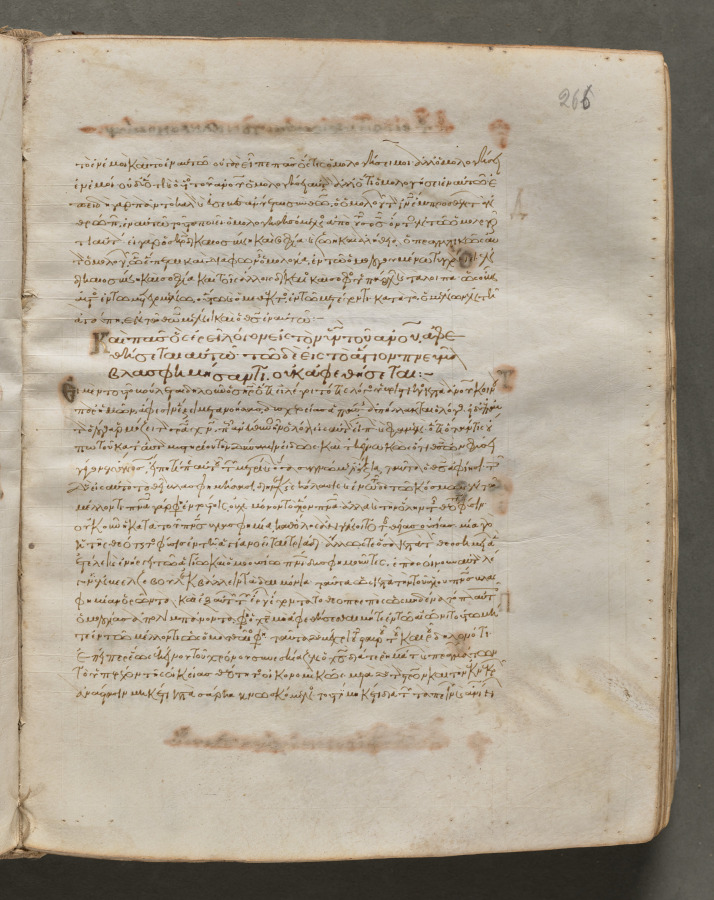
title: Text, folio 266 (recto), from a Gospel Book with Commentaries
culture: Byzantium, Constantinople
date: c. 1000–1100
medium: ink, tempera, and gold on vellum; leather binding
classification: Bound Volume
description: Each of the four gospels in this book opens on a page with brilliantly illuminated borders depicting the author of the text as well as birds—principally peacocks, symbols of the immortality of the soul—and fountains, representing the fountain of life and the salvation of the soul. This volume consists of 428 leaves with texts in Greek. Its level of sophistication suggests that it was probably written and decorated in a monastery in Constantinople.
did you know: Gospel books were carried in procession through Byzantine churches.